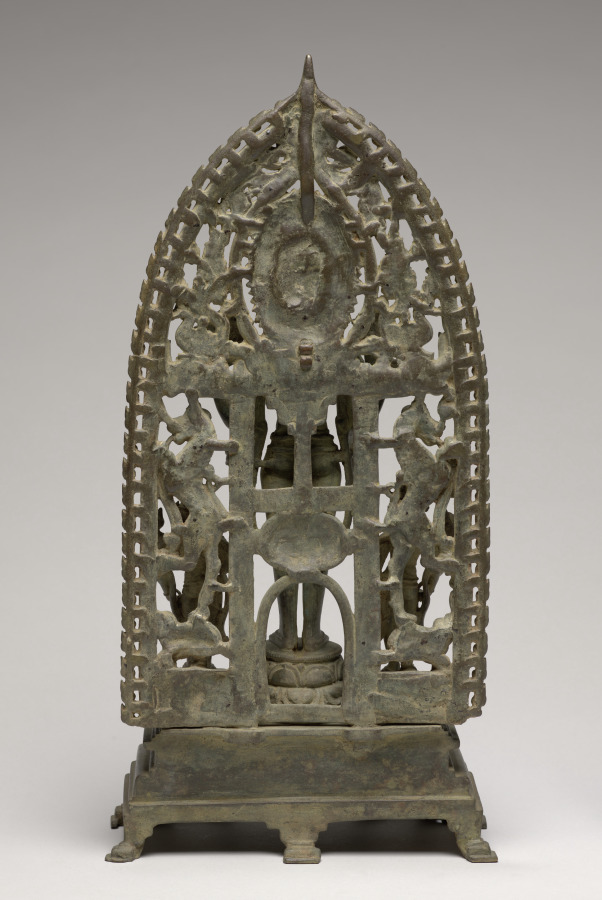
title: Vishnu Attended by Chakrapurusa and Shankhapurusa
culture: East India, Bengal, Pala period, 11th-12th century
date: 1000s–1100s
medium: bronze with silver inlay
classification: Sculpture